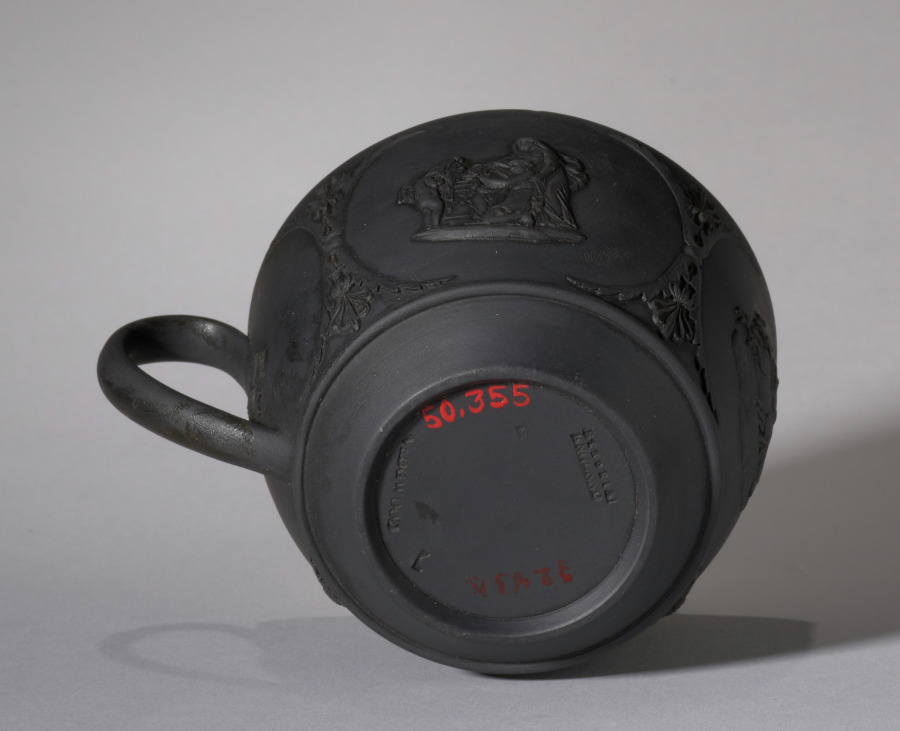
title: Cup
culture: England, Staffordshire, 19th century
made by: Wedgwood Factory (British)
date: 1800s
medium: black basalt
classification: Ceramic